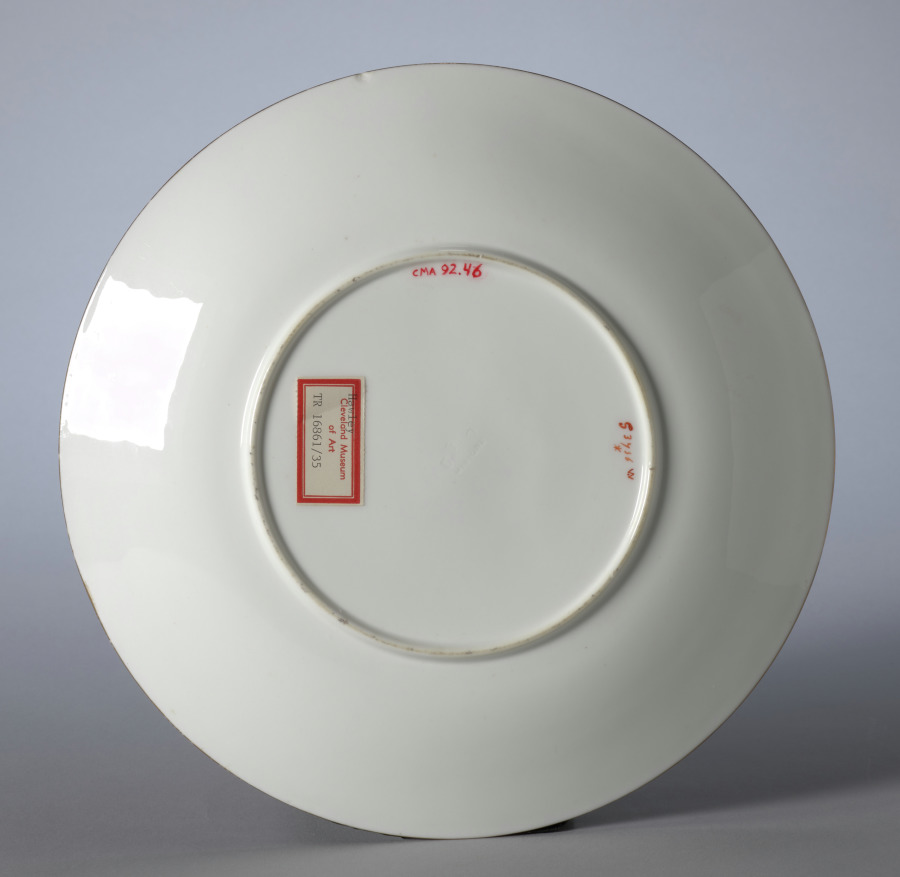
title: Plate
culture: England, 19th century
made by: Minton Pottery and Porcelain Factory (British)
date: 1880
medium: porcelain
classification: Ceramic